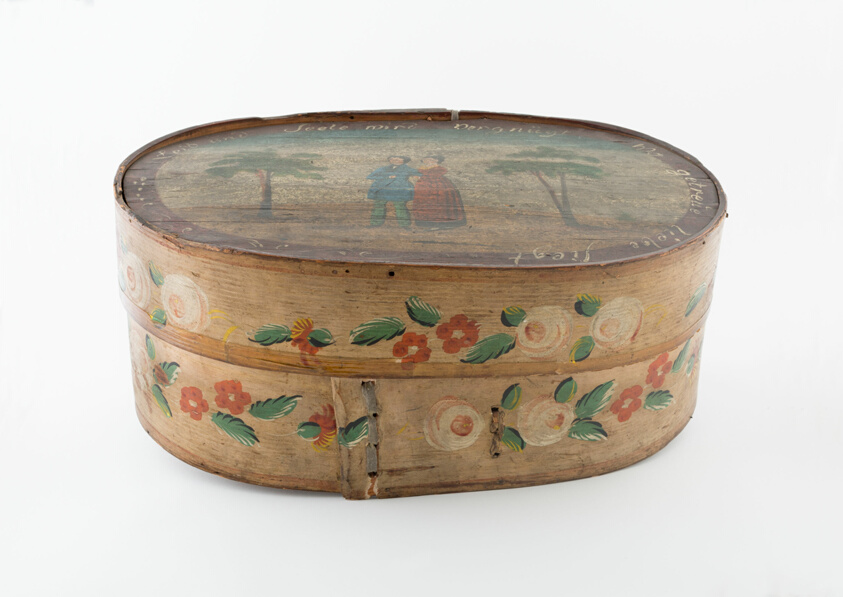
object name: Decorative Arts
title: Box and Cover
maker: Germany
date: 18th to 19th century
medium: Wood and polychrome enamel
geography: Germany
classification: wood; european decorative arts; decorative arts